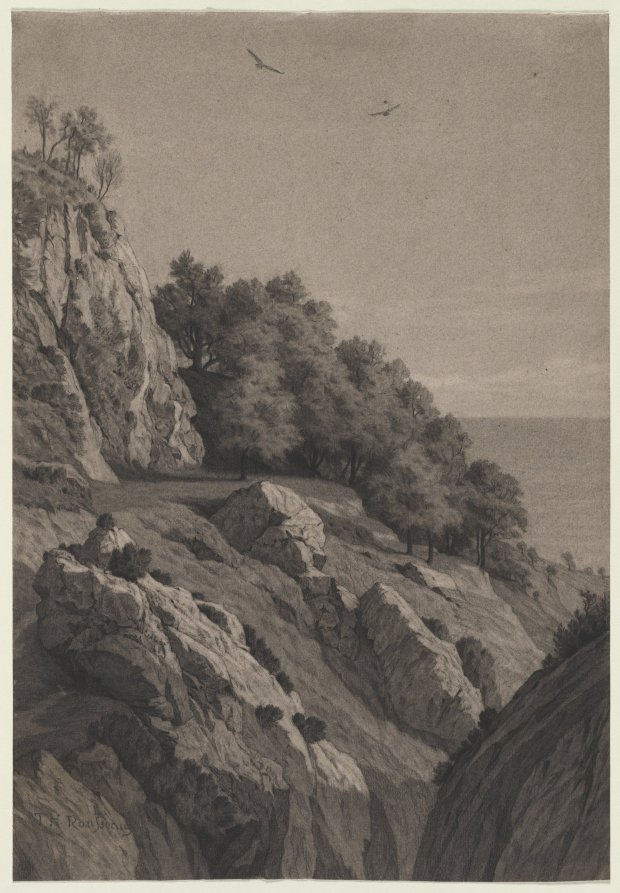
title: Rocky Cliff on a Coast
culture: France, 19th century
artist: Anonymous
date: c. 1850–1860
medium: black chalk (stumped)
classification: Drawing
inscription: signed, lower left, in black chalk: TH. Rousseau (despite signature, it is not by Rousseau)